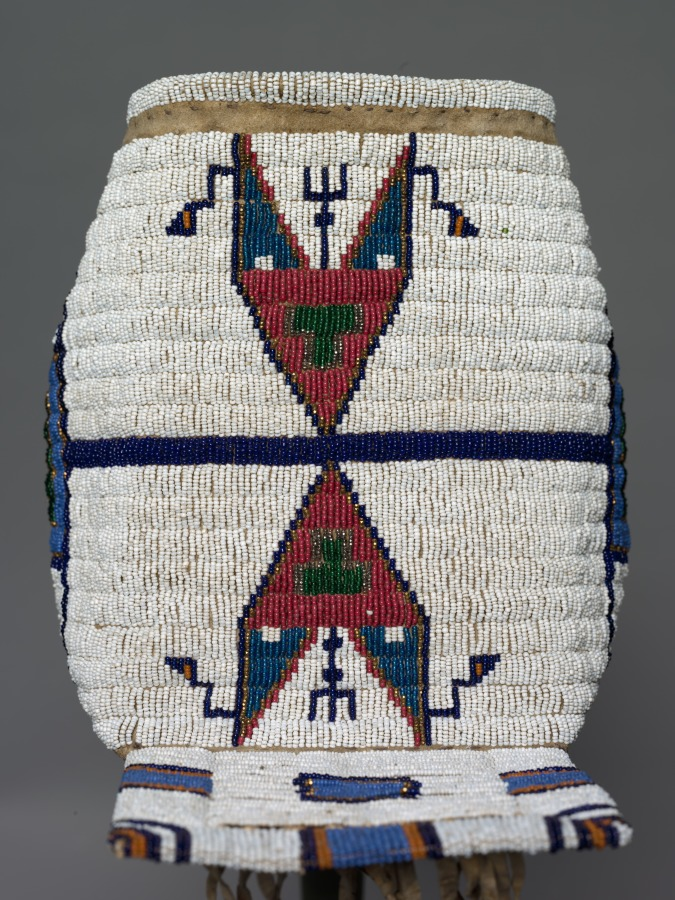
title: Cradle or Baby Carrier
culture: Native North America, Plains, Lakota (Sioux)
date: c. 1900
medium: Native-tanned hide, cotton cloth, glass beads, metal beads, brass bell, sinew thread, cotton thread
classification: Leather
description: Many Plains peoples hold lavishly quilled or beaded cradles in high esteem—they bestow spiritual benefits on the infant and prestige and honor on the family and the maker, usually a female relative. Indeed, today and in the past, creating such a cradle is often regarded as equal to counting coup, the ultimate act of male bravery in which a warrior touches an enemy with a stick known as a coup stick. This cradle was held in the arms; others have wooden frames that can be propped against a support, such as a sofa or a tree, to ease the baby’s socialization into the community.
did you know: In the past, young Plains children spent much of their time in cradles, which remain in occasional use today.